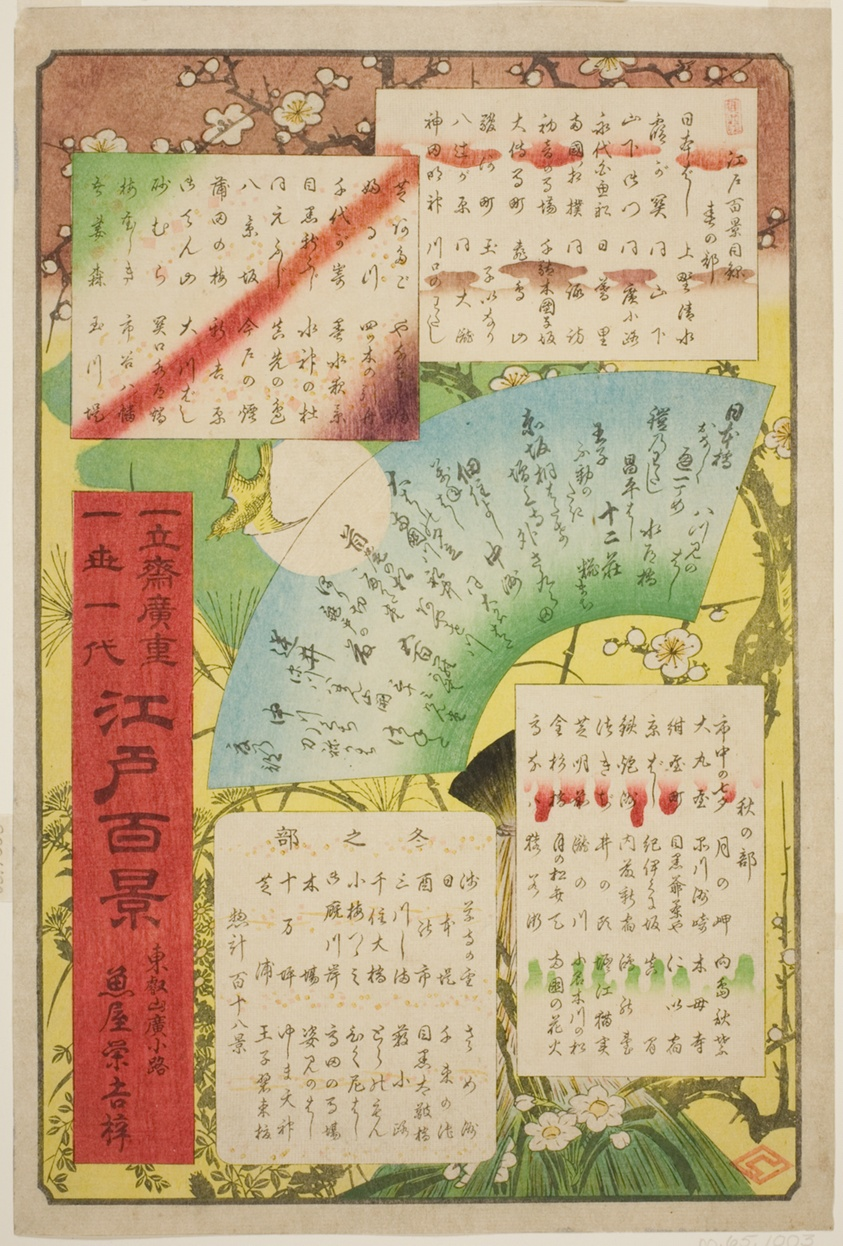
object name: Print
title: Title page and list of contents for "One Hundred Famous Views of Edo (Meisho Edo hyakkei)"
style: Japanese (culture or style)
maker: Utagawa Hiroshige 歌川 広重; Japanese, 1797–1858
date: c. 1858/59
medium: Color woodblock print; oban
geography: Japan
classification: woodblock print; print; asian art